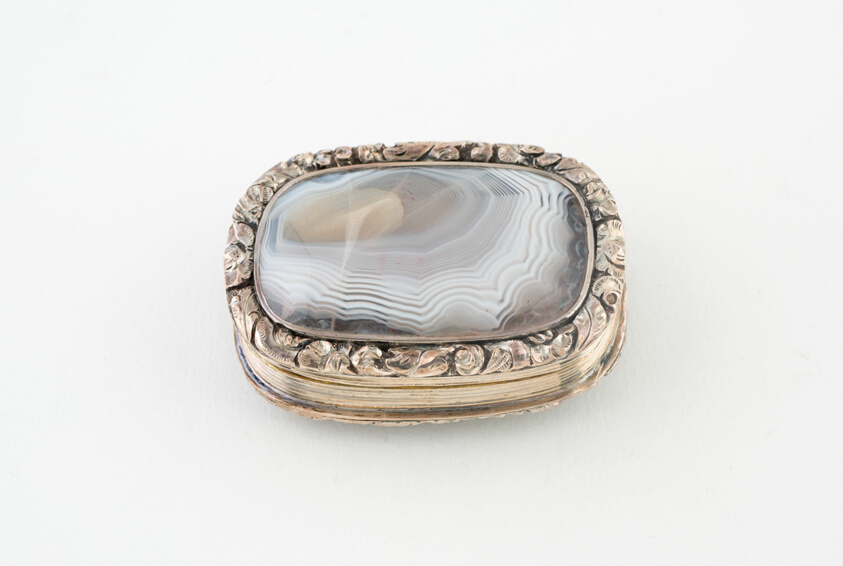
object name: Metalwork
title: Vinaigrette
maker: Possibly Birmingham, England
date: c. 1830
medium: Silver, silver gilt, and hardstone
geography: Birmingham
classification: vinaigrette (container for health care); container for personal use; box; european decorative arts; metalwork; silver; decorative object/ornament